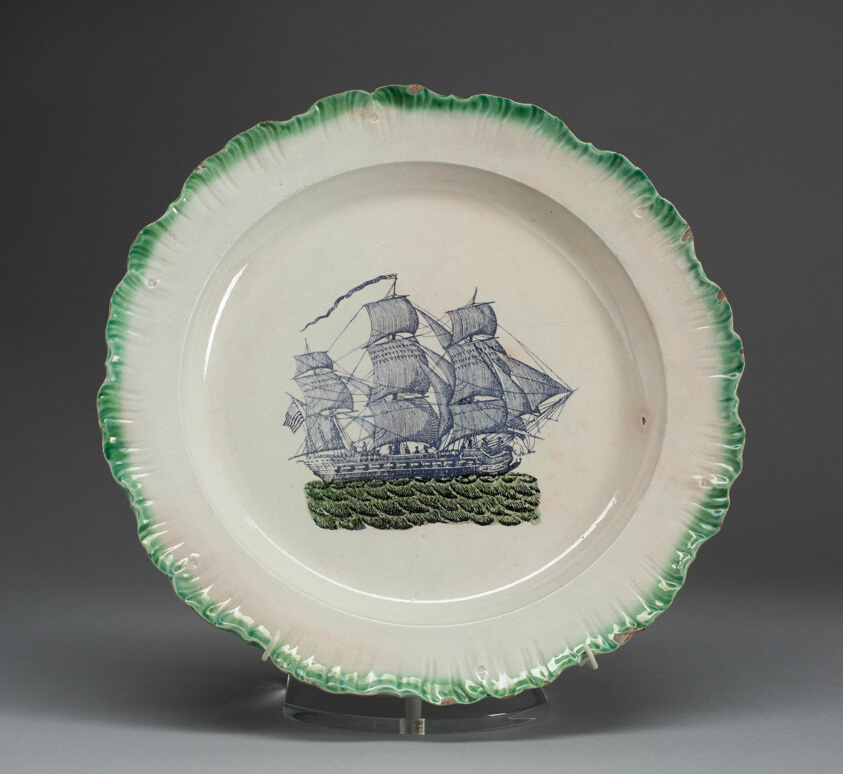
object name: Decorative Arts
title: Plate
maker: English; Made for the American market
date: c. 1780–1810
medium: Creamware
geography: England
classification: plate (general, dish); dish (vessel); american decorative arts; ceramics; european decorative arts; decorative arts